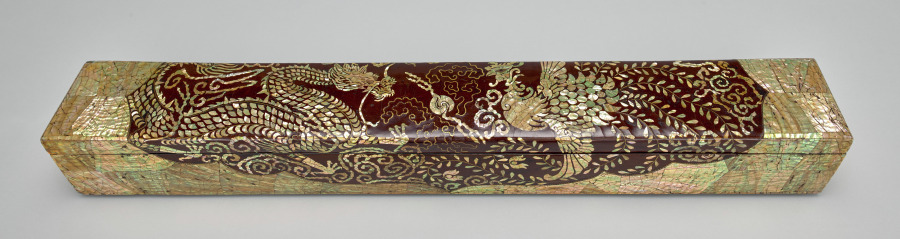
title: Scroll Box with Dragon and Phoenix Design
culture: Korea, Joseon dynasty (1392–1910)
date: 1800s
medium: lacquered wood inlaid with mother-of-pearl and twisted brass and copper wire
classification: Lacquer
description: This large rectangular box was designed for keeping a scroll or an important document. The mother-of-pearl inlaid lacquer rendering of a dragon and phoenix combines texture, color, and shape to produce a dazzling effect. The large and prominent designs of the Joseon-period inlaid lacquer, like on this box, replaced the fine detail and mosaic-like patterns popular in the Goryeo period (918-1392).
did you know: This technique of using the inlays of iridescent mother-of-pearl and abalone shells has been practiced in Korea for over a thousand years,